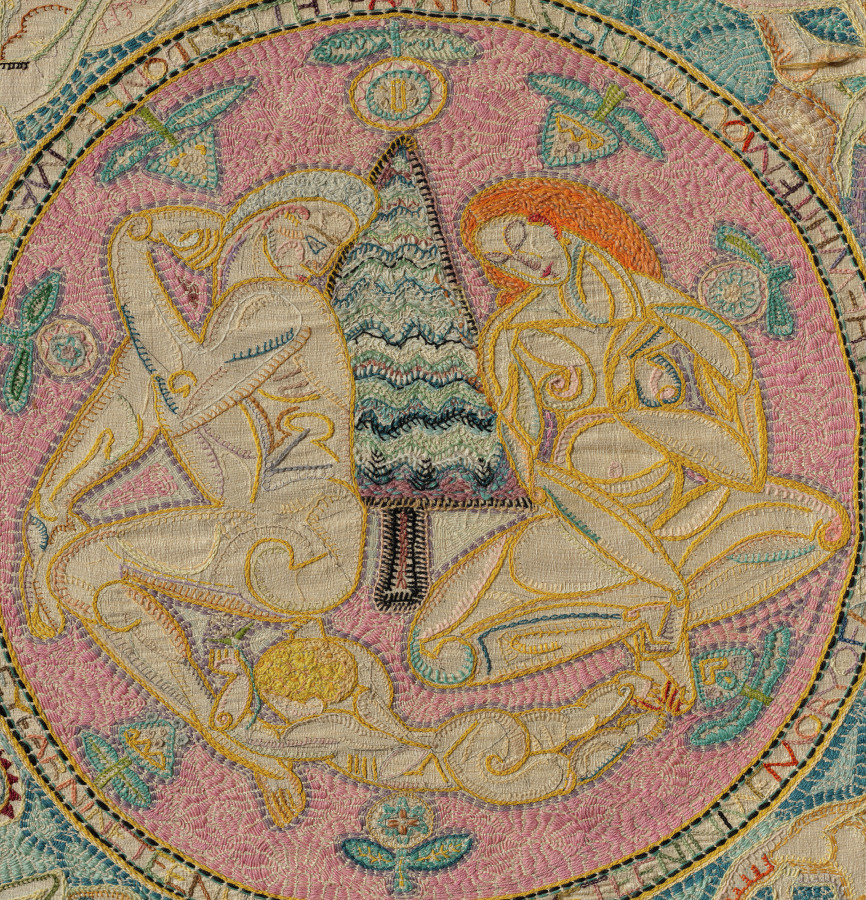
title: The Family (In Memory of a Summer in the White Mountains)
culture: America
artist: Marguerite Zorach (American, 1887–1968)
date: 1917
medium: plain weave silk; wool embroidery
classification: Embroidery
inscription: THE FAMILY / DONE BY MARGUERITE ZORACH IN THE YEAR NINETEEN HUNDRED AND SEVENTEEN IN MEMORY OF A SUMMER IN THE WHITE MOUNTAINS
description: Marguerite Zorach conceived her large, complex embroideries as major artistic statements at a time when the medium was routinely considered “craft,” as opposed to “fine art.” In doing so, she helped to erase such distinctions. One of her most acclaimed works, this example celebrates humanity in harmony with nature, presenting the artist, her husband (a Cleveland-raised sculptor named William Zorach), and their son amid an evergreen tree and four pairs of animals. Very time consuming to create, Zorach’s embroideries are rare.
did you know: In 1925, Zorach served as first president of the New York Society of Women Artists, an organization still in existence.